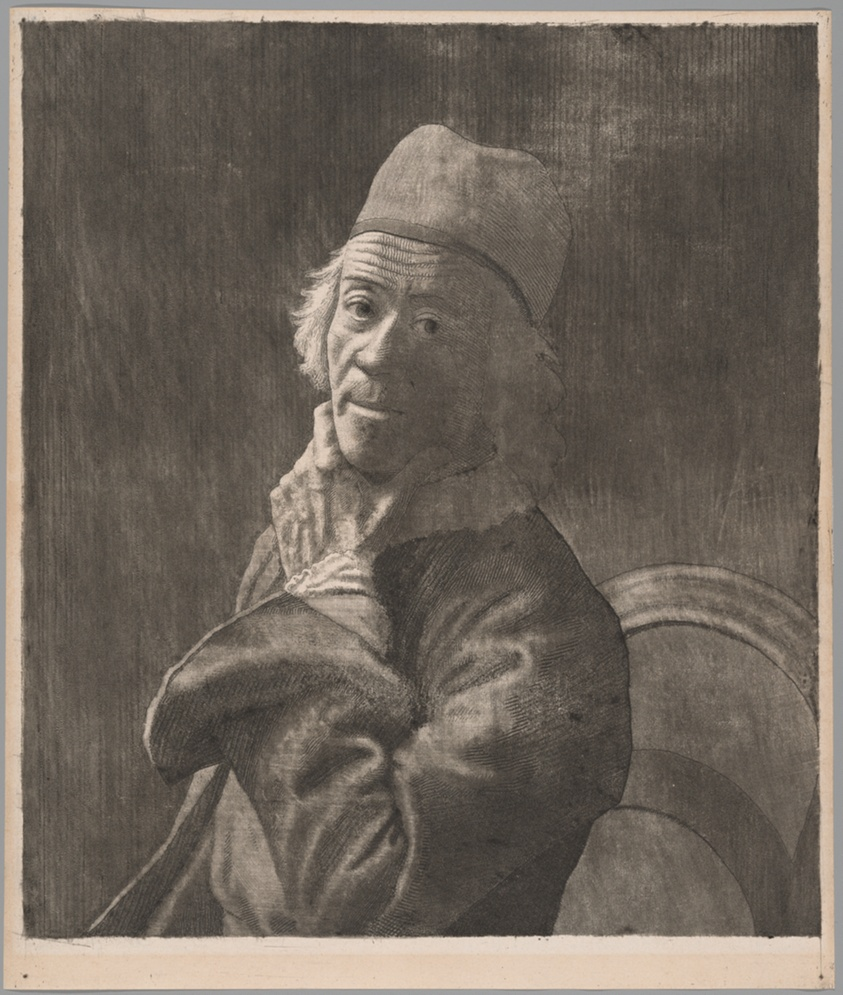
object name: Print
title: The Large Self-Portrait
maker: Jean-Étienne Liotard; Swiss, 1702-1789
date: 1778/81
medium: Etching, roulette, and mezzotint in black on cream laid paper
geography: Switzerland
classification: print; paper; prints and drawing; etching